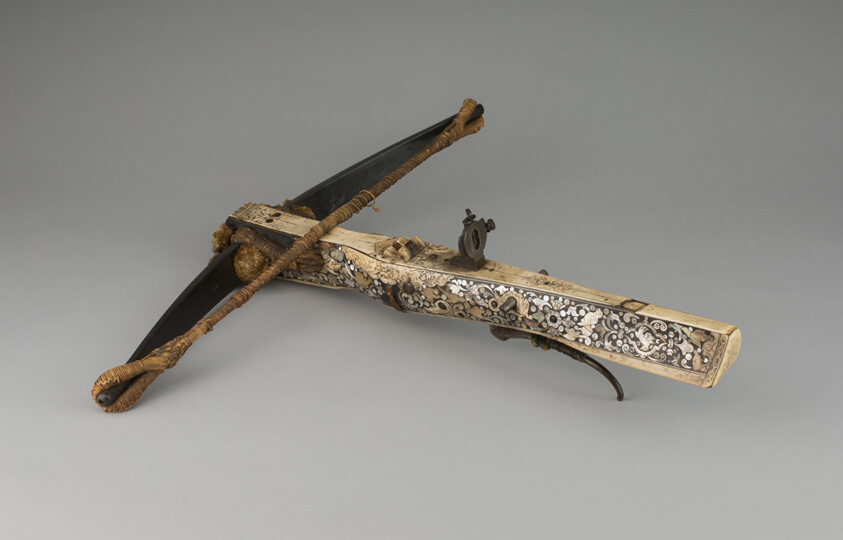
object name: Arms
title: Sporting Crossbow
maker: German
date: 1600/30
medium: Wood, steel, ebony, ivory, mother-of-pearl, brass, cord, and fiber weave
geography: Germany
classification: crossbow; arms; arms and armor